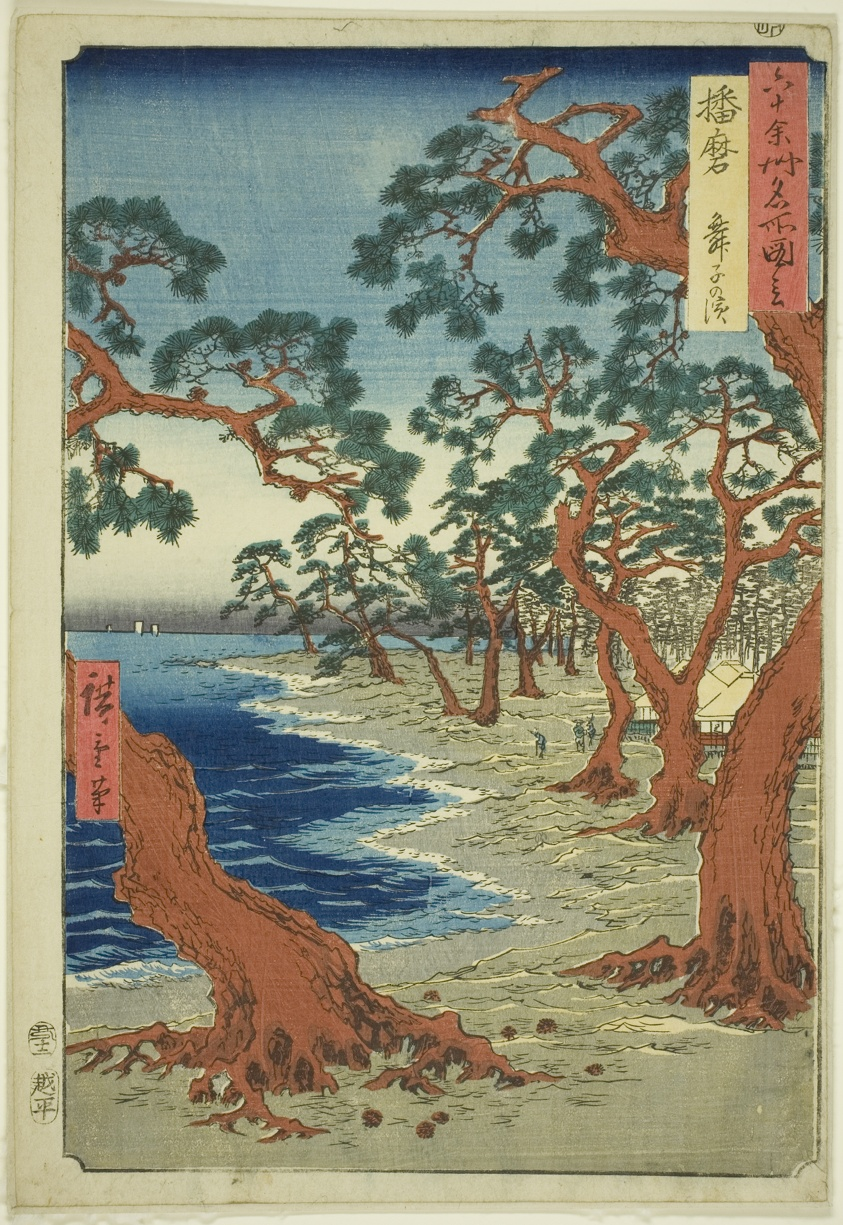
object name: Print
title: Harima Province: Maiko Beach (Harima, Maiko no hama), from the series "Famous Places in the Sixty-odd Provinces (Rokujuyoshu meisho zue)"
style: Japanese (culture or style)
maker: Utagawa Hiroshige 歌川 広重; Japanese, 1797-1858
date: 1853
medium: Color woodblock print; oban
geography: Japan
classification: woodblock print; print; asian art